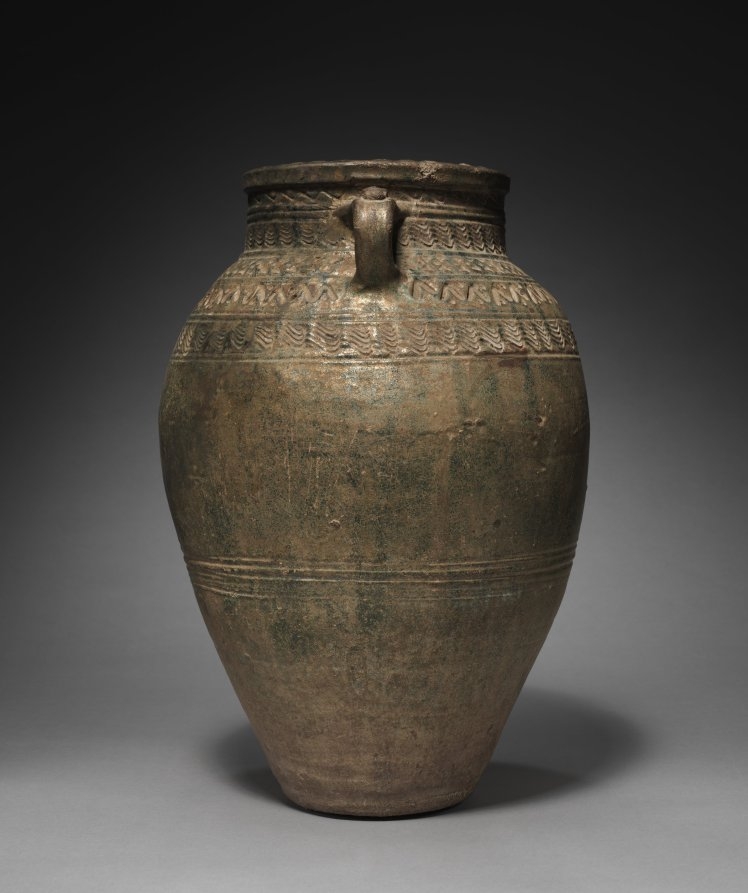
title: Jar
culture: Iran, Sasanian Empire (224–651 CE)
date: 222–650 CE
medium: earthenware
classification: Ceramic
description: Simply decorated with bands of wavy and dotted sawtooth patterns on the neck and shoulder, this large jar features two small handles for lifting and a wide mouth for easy access to its contents. A shiny glaze covers the exterior surface.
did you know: This large vessel was thrown in three or four sections.